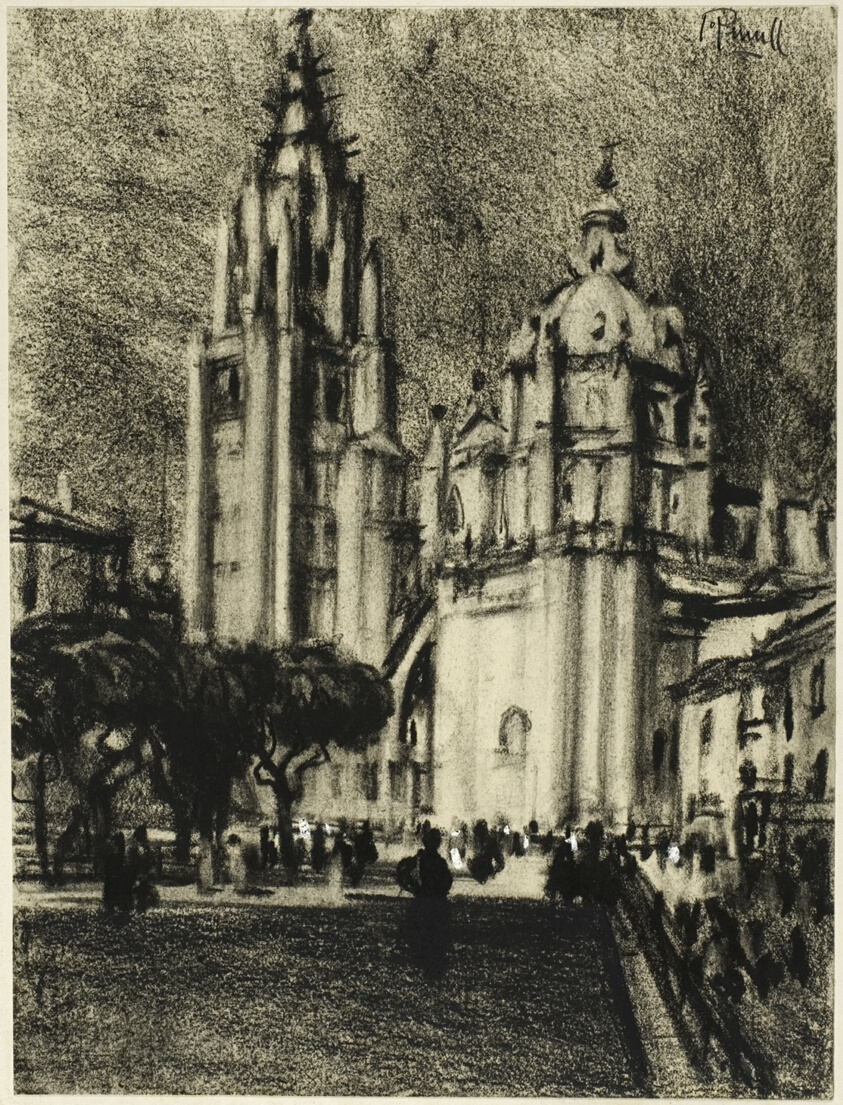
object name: Drawing and Watercolor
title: The Cathedral, Toledo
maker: Joseph Pennell (American, 1857-1926)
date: c. 1903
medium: Oiled charcoal with stumping and erasing, heightened with touches of white gouache, on cream wove paper, perimeter mounted on off-white wood pulp laminate board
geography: United States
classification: charcoal; drawings (visual works); prints and drawing